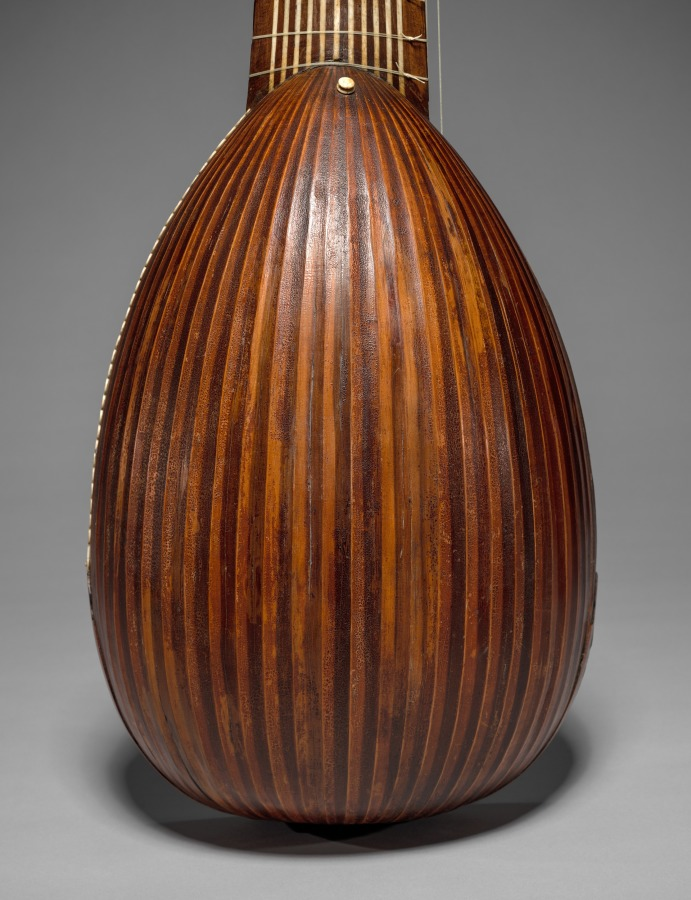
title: Lute or Tiorbino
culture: Italy, probably made in the mid-17th century, but modified by later repair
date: c. 1620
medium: wood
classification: Musical Instrument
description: The lute was the most important musical instrument in secular settings throughout the 16th and 17th centuries. Not only a virtuoso instrument with a huge repertoire, the lute provided the ideal accompaniment for the voice, played an essential role in ensembles, figured in masques and operas, and was played by amateurs as well as professionals. A highly specialized instrument, this tiorbino is a type of long-necked lute resembling a theorbo, but significantly smaller and pitched an octave higher. An object of great rarity, it is one of the smallest Baroque tiorbinos to survive.